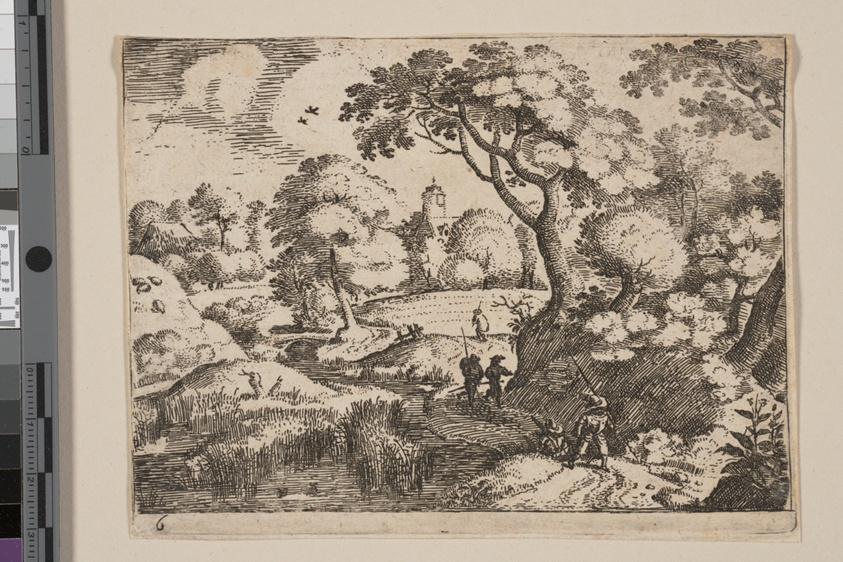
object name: Print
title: Path between Swamp and Wooded Bank, from Landscapes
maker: Jacob Savery; Flemish, 1566–1603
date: c. 1595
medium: Etching on ivory laid paper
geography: Flanders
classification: etching; paper; print; prints and drawing